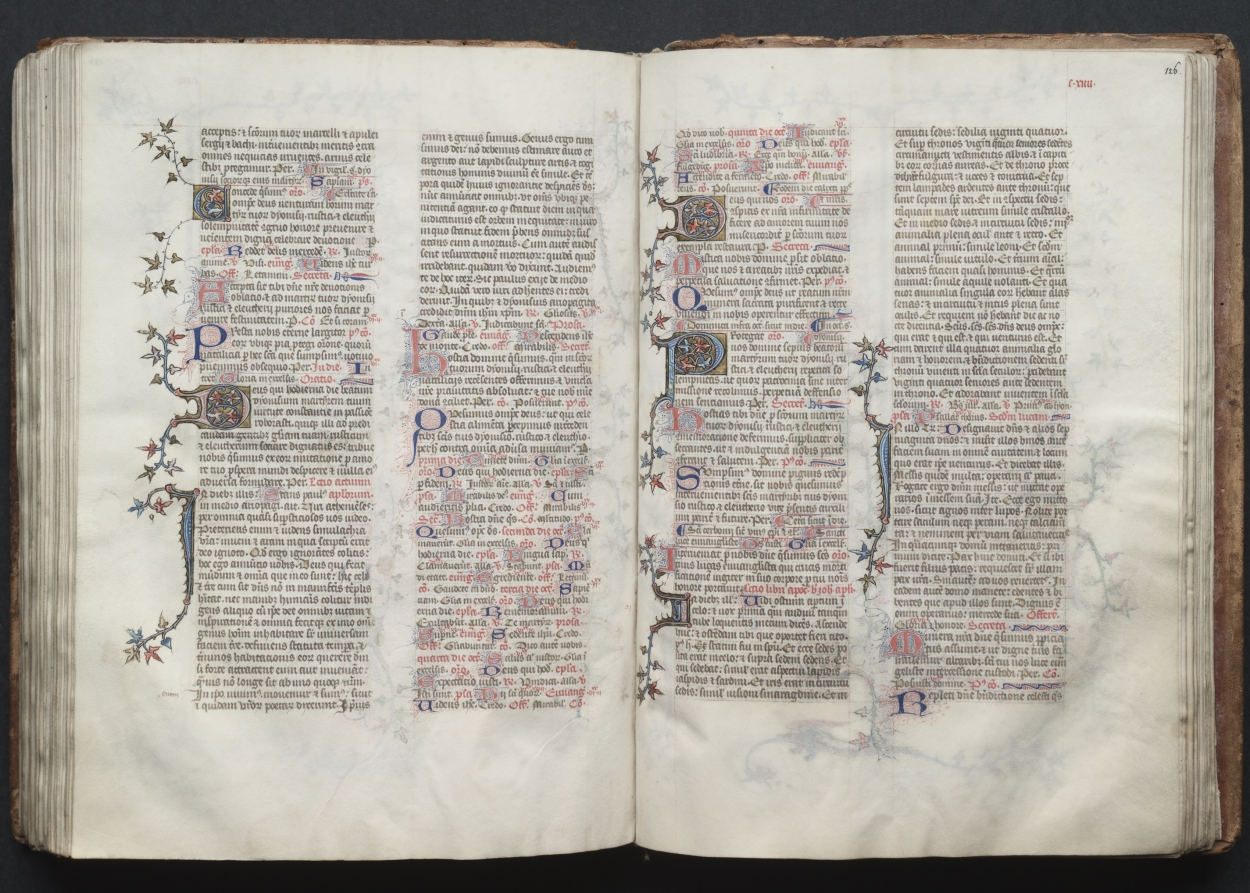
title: The Gotha Missal: Fol. 125v, Text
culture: France, Paris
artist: Master of the Boqueteaux (French)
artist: and Workshop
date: c. 1375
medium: ink, tempera, and gold on vellum; blind-tooled leather binding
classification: Bound Volume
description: The style and quality of this manuscript's decoration is typical of deluxe Parisian books made for aristocratic or royal patrons. Most of the book's decoration appears to be the work of the Master of the Boqueteaux, an artist active at the court of King Charles V (died 1380). His style was apparently shared by a number of book illuminators working in and around Paris. It is very possible that the Gotha Missal belonged to Charles V, but is not provable because the manuscript has no royal portraits and lacks a colophon. Given the book's magnificent decoration, however, it would seem that it was produced for a Valois prince, if not for the king himself. The manuscript receives its name from the German dukes of Gotha, its later owners.